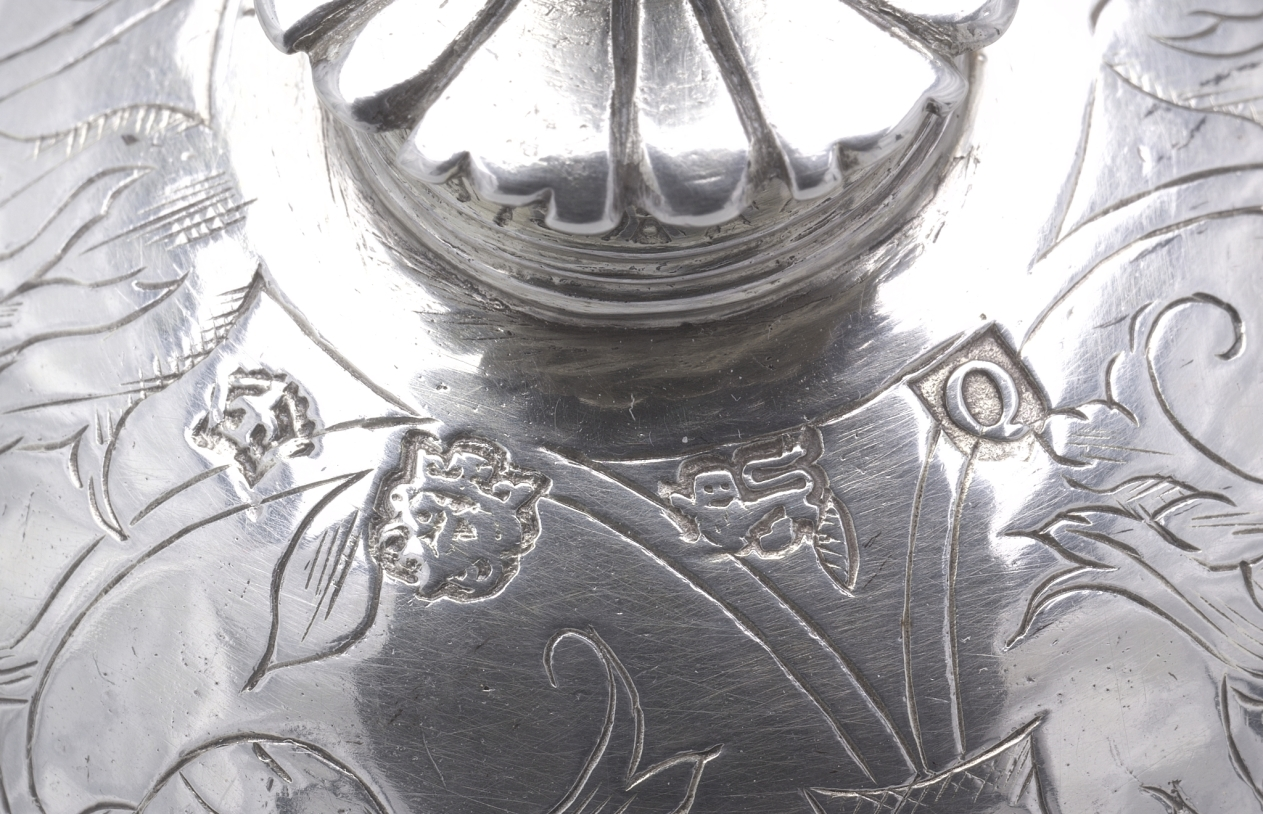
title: Standing Cup and Cover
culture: London, England, late 16th century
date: 1593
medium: silver, partially gilt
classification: Silver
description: Produced during the last years of the Tudor dynasty (1485–1603), this vessel exemplifies the symmetrical patterns, horizontal designs, and clear division of space typical of English silverwork at the time. The functional shape and ornamental designs characteristic of standing cups made them ideal for ceremonial occasions.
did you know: Often made for members of guilds and trade associations in London, standing cups were frequently used during toasts.